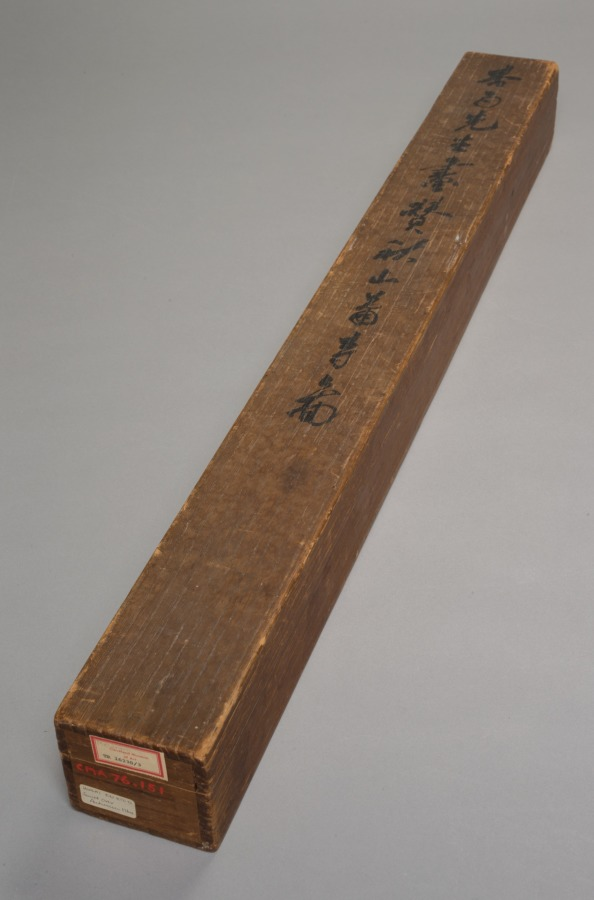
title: Sunset over Autumn Mountains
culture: Japan, Edo period (1615–1868)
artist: Hoashi Kyōu (Japanese, 1810–1884)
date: 1869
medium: hanging scroll; ink and light color on silk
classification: Painting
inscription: translation of poem [by Nora Liu]: The way was forgotten while enjoying the conversation and colors of Autumn, The road entered among the red trees and the white clouds, The trace of a path led to the lonely temple where the monks received enlightenment, The sound of chimes echo remotely in the mountains where the sunset falls. In the year 1869, Kyou